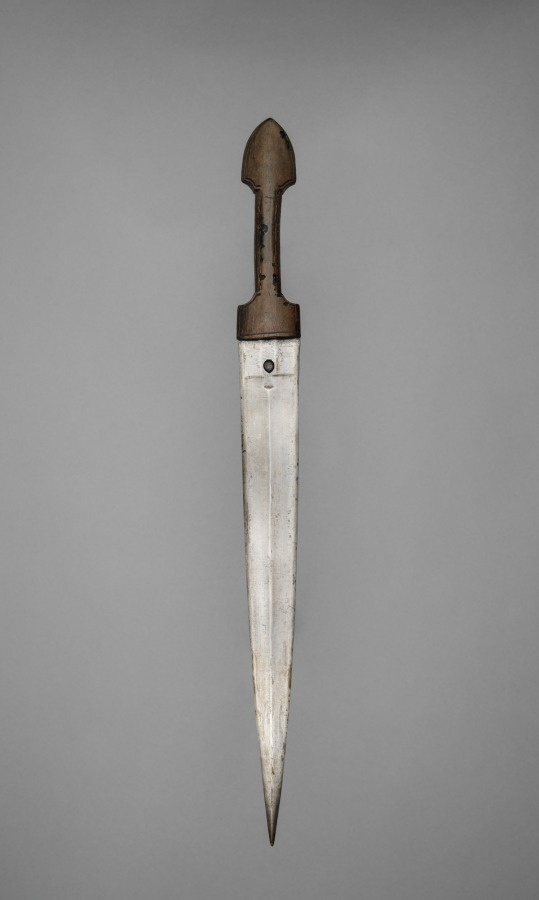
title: Dagger (Khanjali)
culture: Transcaucasian, Georgian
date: 1700s–1800s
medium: carnelian?, steel, wood handle, copper alloy, and silver gilt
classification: Arms and Armor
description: A khanjali is a dagger popular with the inhabitants of Georgia and the rest of the Caucasus since ancient times. They often have a single offset groove on each face of the blade and the shape is similar to the ancient Roman gladius and the Scottish dirk.